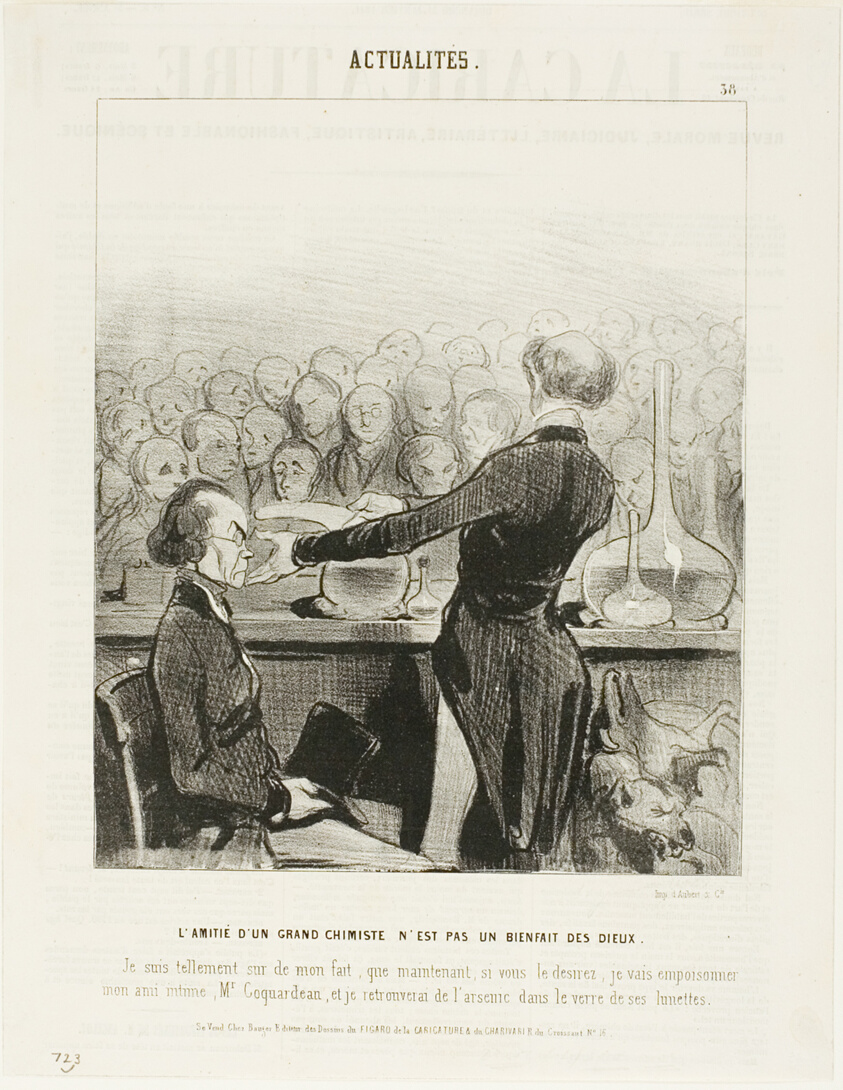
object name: Print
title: Friendship With a Great Chemist is Not Always a Godsend… “I am so sure of my findings that I will now poison my best friend, Mr. Coquardeau, and I will retrieve arsenic in his eyeglasses,” plate 39 from Émotions Parisiennes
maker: Honoré Victorin Daumier; French, 1808-1879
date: 1841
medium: Lithograph in black on white wove paper, with letterpress verso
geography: France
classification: lithograph; print; prints and drawing